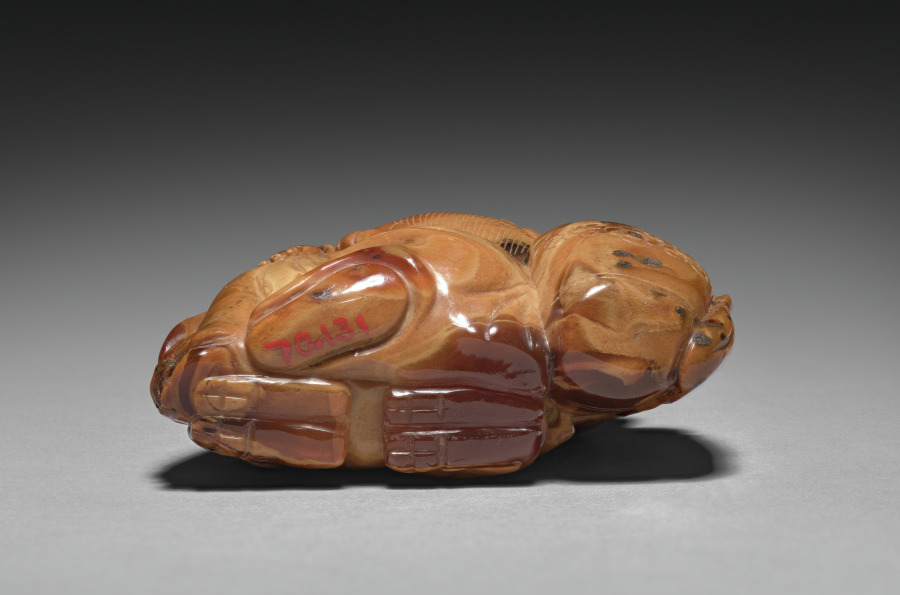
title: Li Taibo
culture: China, Qing dynasty (1644-1911)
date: 1700s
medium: amber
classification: Stone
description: This piece of ochre amber is carved in the round in the form of Li Bai 李白 (701–762), also known as Li Taibai or Li Taibo, 李太白. He was a poet in the golden age of Chinese poetry. Around a thousand poems are attributed to him. Li’s eyes are closed, an arm wrapped around his wine jar, in a drunken sleep. Perched on his shoulder is a bat, considered a lucky symbol as the Chinese word for bat, 蝠 fú, is pronounced the same as “good fortune” 福. Deer, like the one nestled behind Li, traditionally symbolize longevity and prosperity. These auspicious symbols create a bittersweet contrast with the legendary story that Li drowned while drunk when reaching to grasp the moon's reflection in the river.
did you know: Li Bai was one of the Eight Immortals of the Wine Cup, Tang dynasty scholars who enjoyed drinking alcohol.